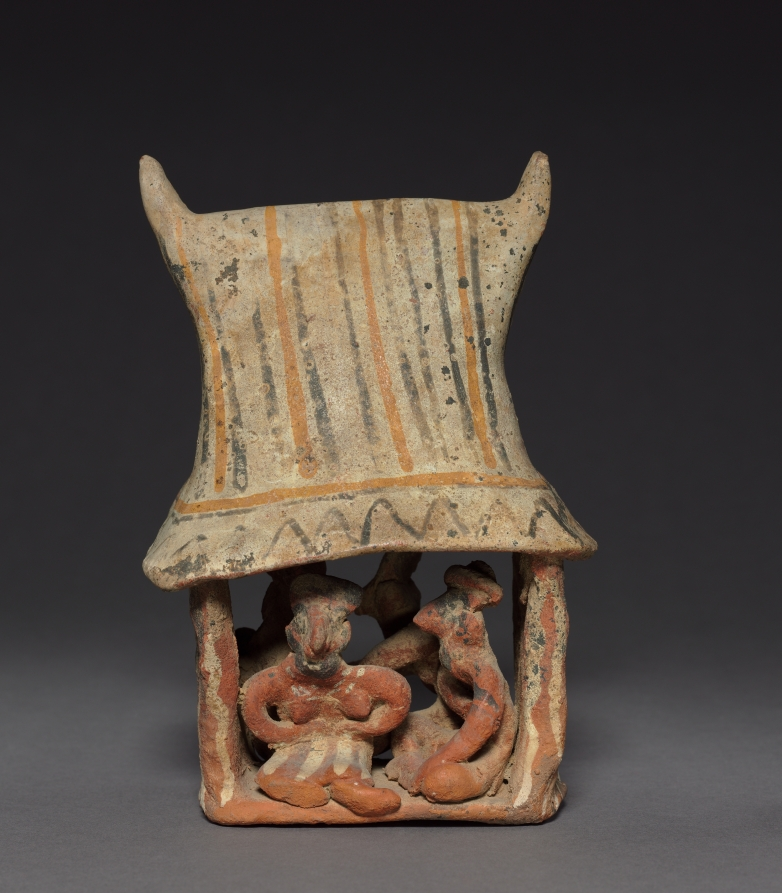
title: Architectural Scene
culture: Mesoamerica, West Mexico, Nayarit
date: 200 BCE–300 CE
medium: ceramic, pigment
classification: Sculpture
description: This scene, which shows several people inside a structure, is a compact version of larger, more elaborate examples. Like them, it could depict festivities held to commemorate one of life’s milestones, such as marriage or the coming of age.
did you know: This scene may depict festivities held to commemorate one of life’s milestones, such as marriage.